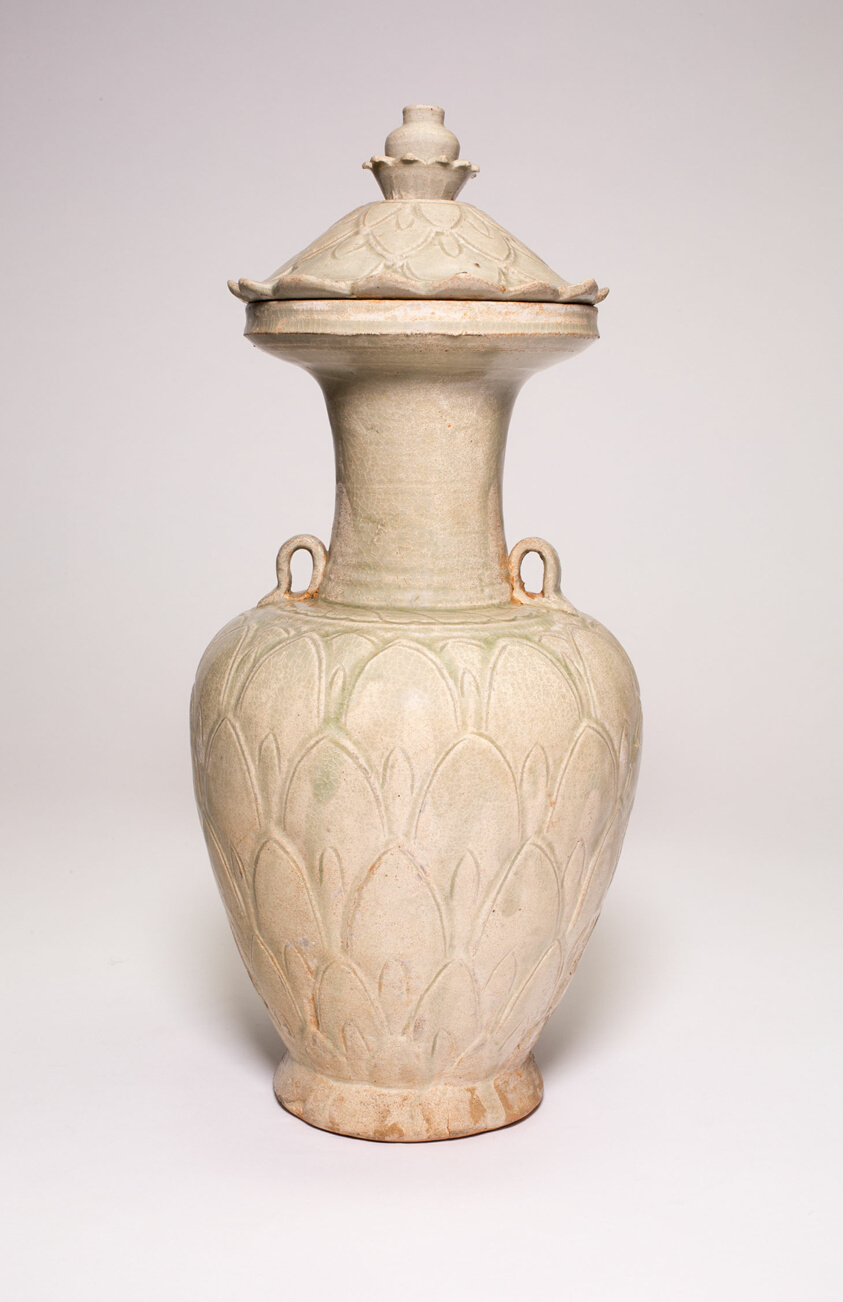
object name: Vessel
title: Covered Vase with Lotus Petals Decoration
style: Chinese (culture or style)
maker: China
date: Northern Song dynasty (960–1127), late 10th/early 11th century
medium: Yue ware; stoneware with grayish green glaze and underglaze incised decoration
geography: China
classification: vase; vessel; stoneware; ceramics; asian art